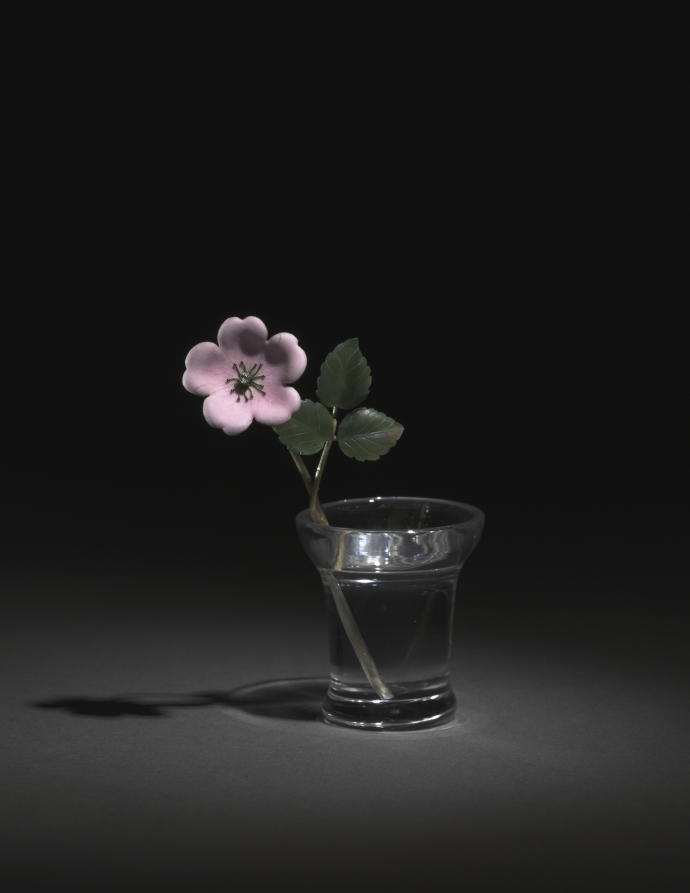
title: Flower Study of a Wild Rose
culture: Russia, St. Petersburg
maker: House of Fabergé (Russian, 1842–1918)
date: c. 1885–1915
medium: gold, silver, enamel, diamond, jade, rock crystal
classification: Miscellaneous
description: This delicate flower study resembles a stem of wild rose. Fabergé’s inspiration for his flower studies is said to have come from the floral brooches of precious stones that were made in the 1700s for Catherine the Great as well as from the Japanese art of flower arranging, known as ikebana. Small and delicate, Fabergé’s flower studies were given as intimate gifts to friends by the tsarina and others in the court. She also liked to take them around to wherever the imperial family was residing as a reminder of spring during the harsh Russian winters.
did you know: The stems of Fabergé’s flower studies are set into little basins carved from rock crystal to resemble pots of water.